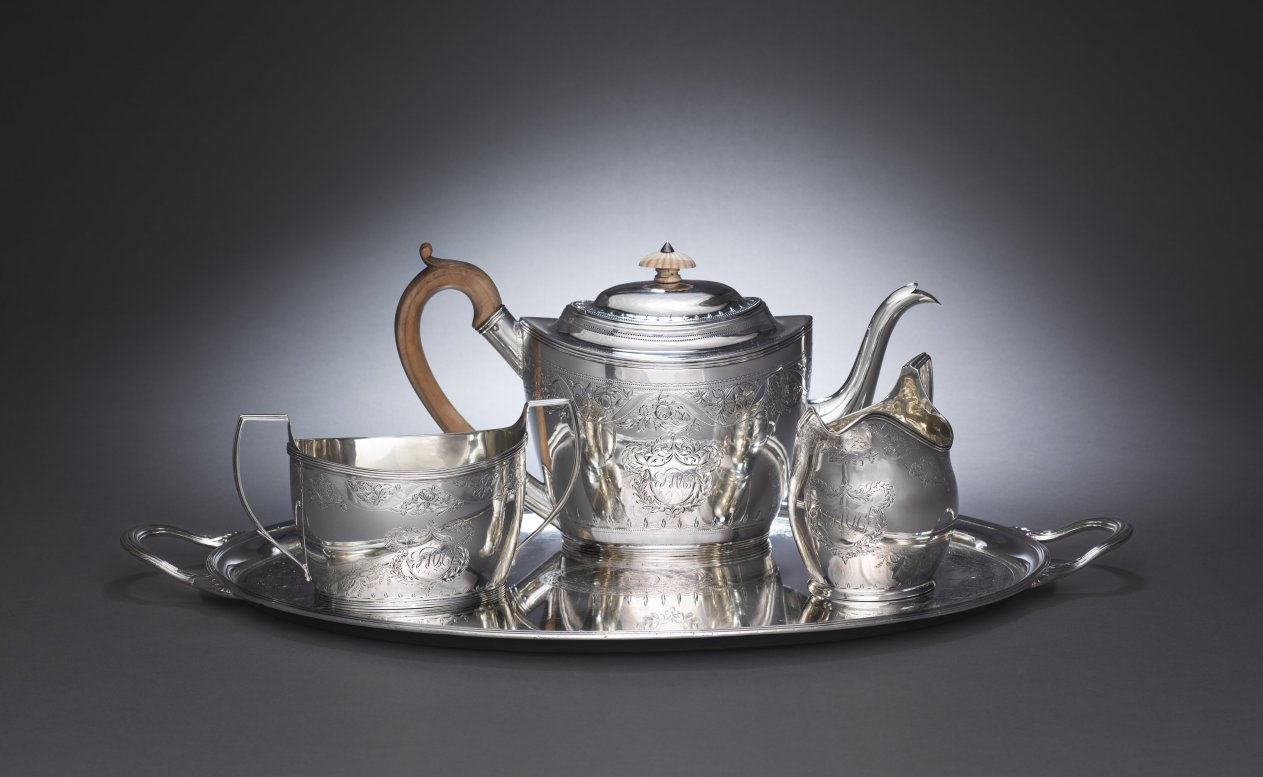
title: Tea Service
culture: London, England, early 19th century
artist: Anne Bateman (British, 1748–1813)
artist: Peter Bateman (British, 1740–1825)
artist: William (I) Bateman (British, 1774–1850)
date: c. 1790–1810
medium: silver on copper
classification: Silver